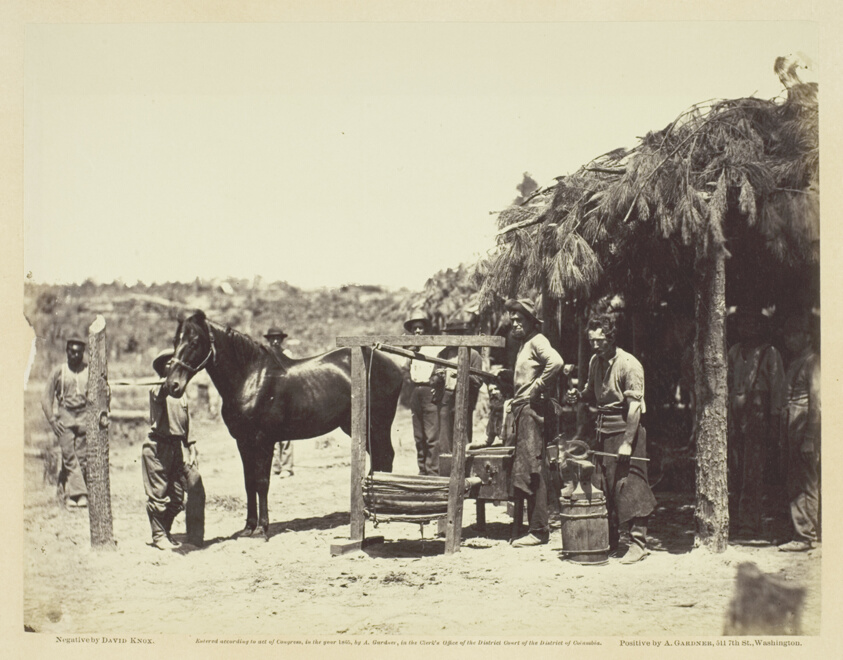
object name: Photograph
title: Army Forge Scene, in Front of Petersburg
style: 19th century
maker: David Knox (American, active 19th century)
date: August 1864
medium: Albumen print, pl. 77 from the album "Gardner's Photographic Sketch Book of the War, Volume II" (1866)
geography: United States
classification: photograph; albumen silver print; photography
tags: Collected by Hugh Edwards, Gardner's Photographic Sketch Book